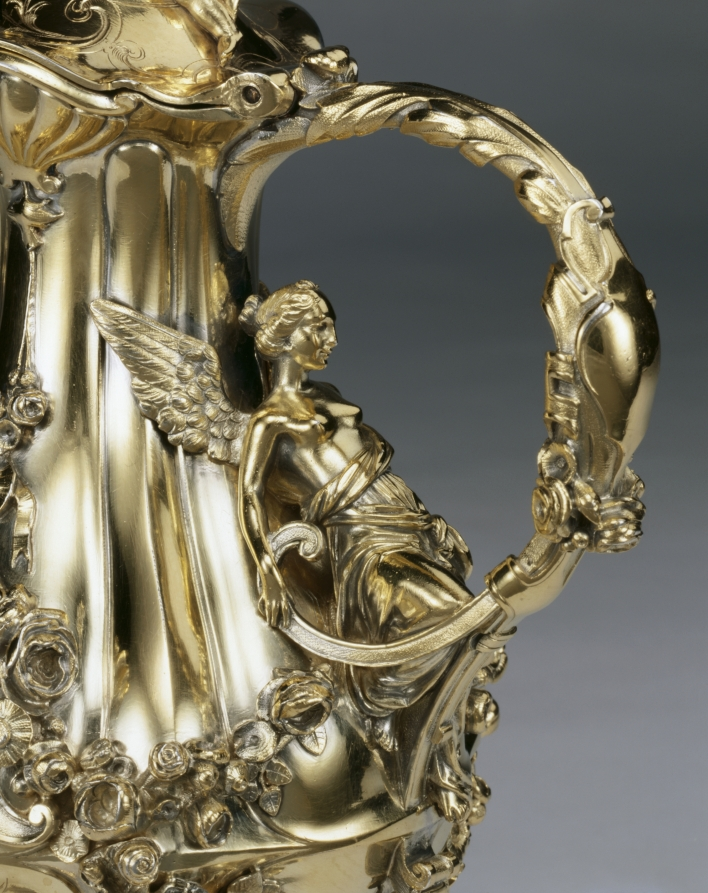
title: Covered Jug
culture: France, 19th century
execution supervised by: Jean-Valentin Morel (French, 1794–1860)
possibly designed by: Jules Dieterle (French, 1811–1889)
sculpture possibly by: Jules Klagmann (French, 1810–1867)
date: c. 1845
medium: gilded silver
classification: Silver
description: The elegance and richness of this ewer demonstrate the high level of technical mastery achieved by its maker. Morel studied under his father, a Parisian lapidary (someone who cuts, polishes, and engraves hard stones), and with Adrien Vachette, a maker of gold boxes. In 1842 he went into partnership with Charles-Edmond Duponchel, which lasted until the late 1840s, at which time he established himself in London, remaining there until 1852, when he returned to Paris. Morel frequentlyfollowed the designs of others, and it has been suggested that in the case of this pitcher his well-known contemporary, Jules Dieterle (1811-1889), may have conceived the overall form. The female figure seems to have been based on a design by the sculptor Jules Klagmann (1810-1867).